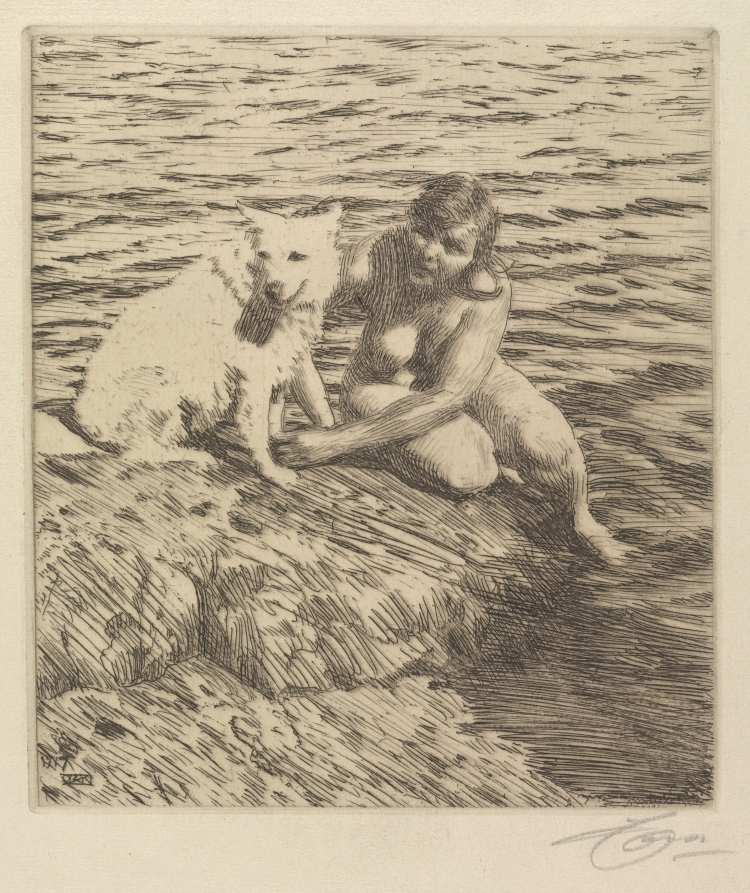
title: Sappo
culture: Sweden, 20th century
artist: Anders Zorn (Swedish, 1860–1920)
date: 1917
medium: etching and drypoint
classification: Print